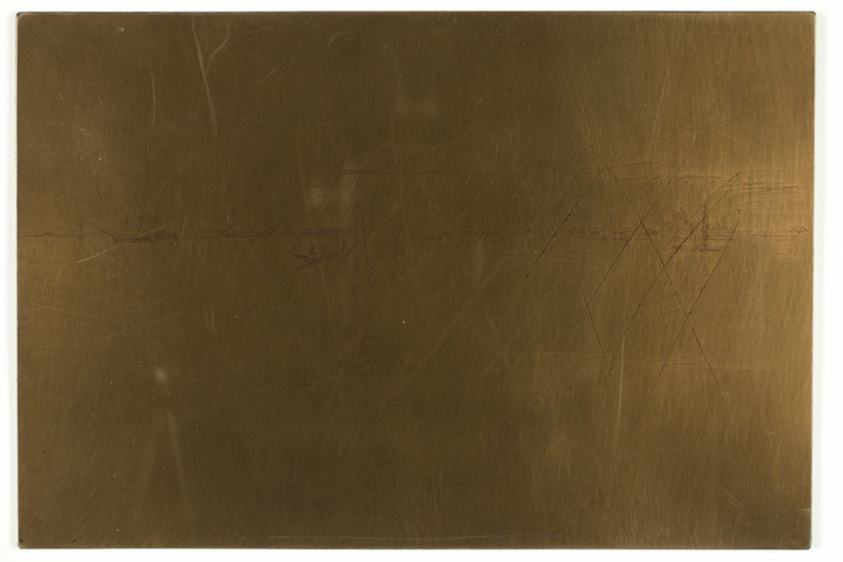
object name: Print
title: Long Lagoon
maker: James McNeill Whistler (American, 1834-1903)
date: 1879/80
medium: Cancelled copper plate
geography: United States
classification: copper plate; prints and drawing; matrix; print